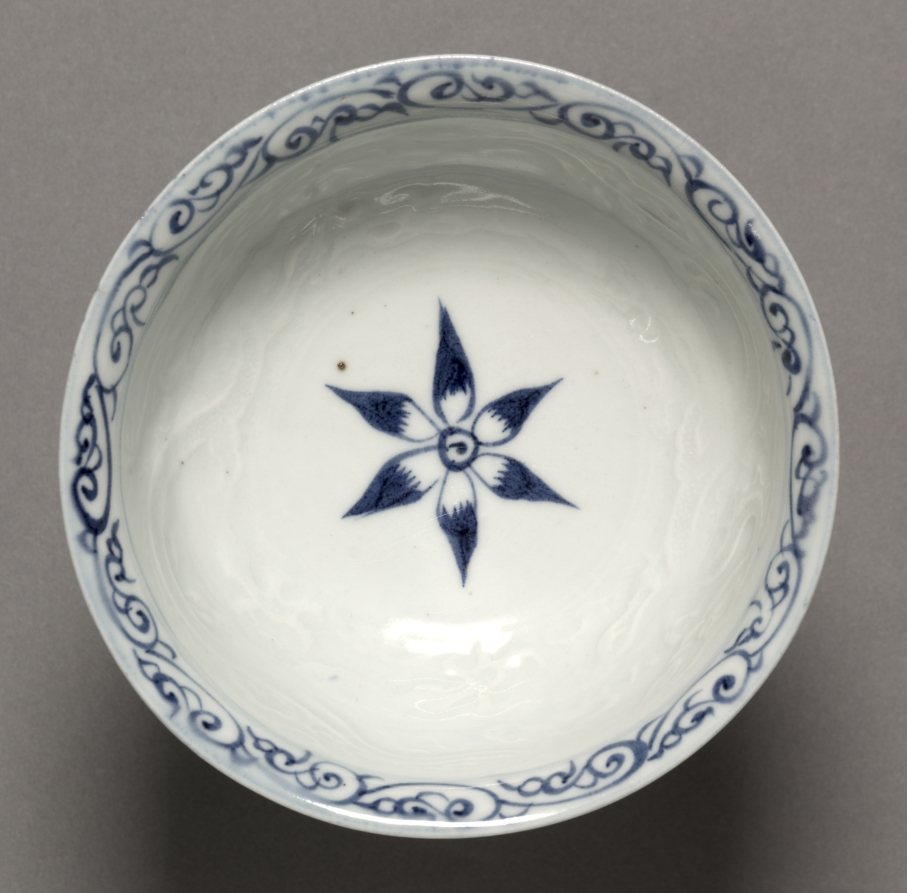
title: Stem Cup with Dragon Pursuing Flaming Jewel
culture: China, Jiangxi Province, Jingdezhen kilns, Yuan dynasty (1271–1368)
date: 1300s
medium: porcelain with underglaze cobalt blue and molded decoration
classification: Ceramic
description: The stem cup as a porcelain vessel shape was introduced to China by the Mongols from Northeast Asia when they ruled the country in the 14th century.